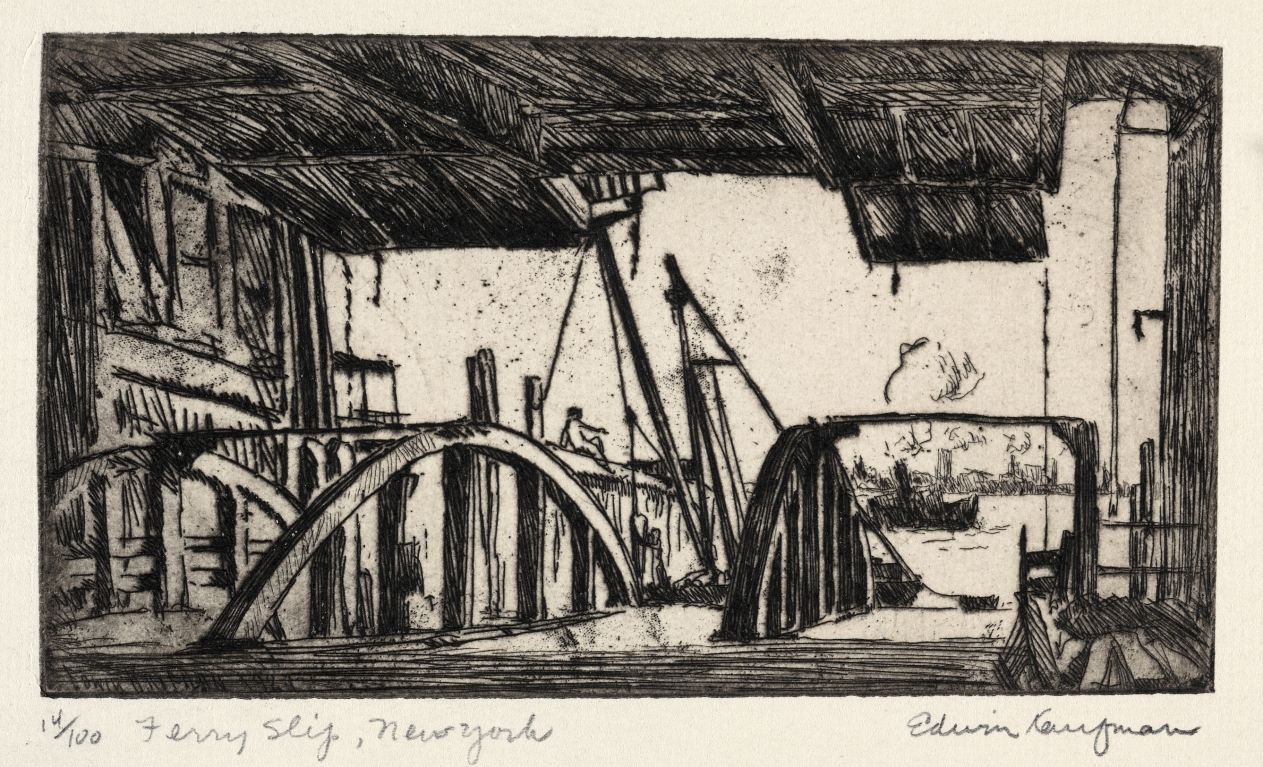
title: Ferry Slip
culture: America, Ohio, Cleveland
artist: Edwin Kaufman (American, 1906–1939)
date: 1927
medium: etching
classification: Print